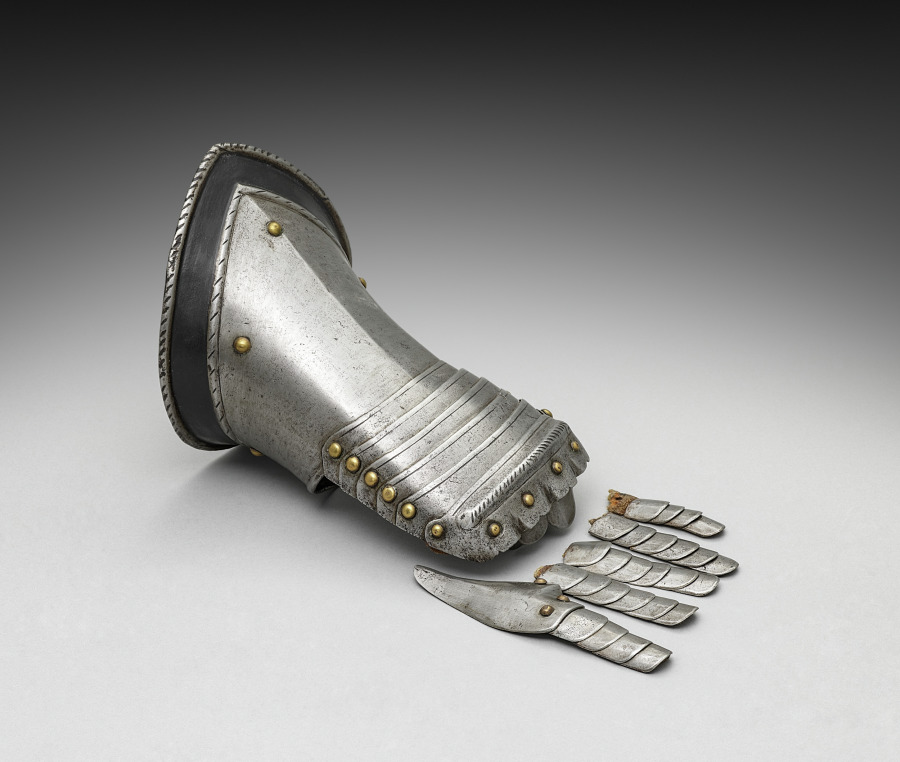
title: Left Gauntlet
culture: Germany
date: c.1550–1570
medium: iron, steel, leather and brass rivets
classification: Arms and Armor